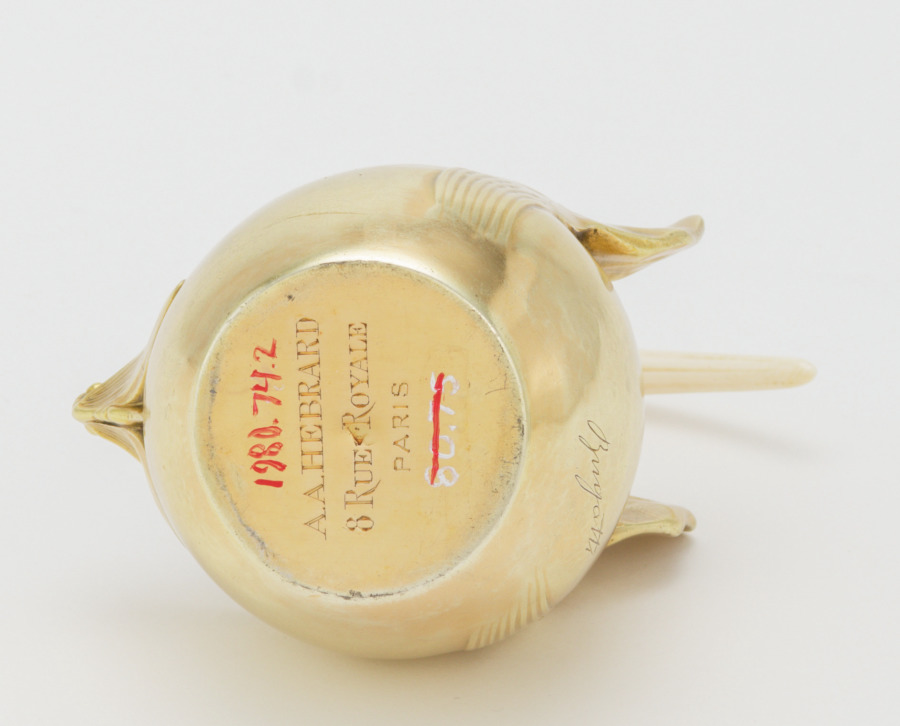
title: Creamer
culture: France, Paris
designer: Carlo Bugatti (Italian, 1856–1940)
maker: Adrien-Aurélien Hebrard (French, 1866–1937)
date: c. 1907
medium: Gilt silver and ivory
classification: Silver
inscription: Made by A. A. Hebrard Firm, Paris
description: This tea and coffee service, salver, and table, together with some now missing cups, were all designed by Carlo Bugatti as an ensemble and presented at the 1902 exposition devoted to decorative arts in Turin, Italy. The set was probably acquired from Bugatti's 1907 exhibition at the Galerie Hébrard in Paris by a wealthy South African widow, Anna Blake, who was living there at the time. Some of the animal and insect motifs suggest mythical beasts or the fossils of prehistoric animals. When Mrs. Blake returned to Cape Town, she took these and other pieces designed by Bugatti with her, and they remained in South Africa throughout her lifetime.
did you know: This creamer is part of a tea and coffee service designed by Carlo Bugatti.